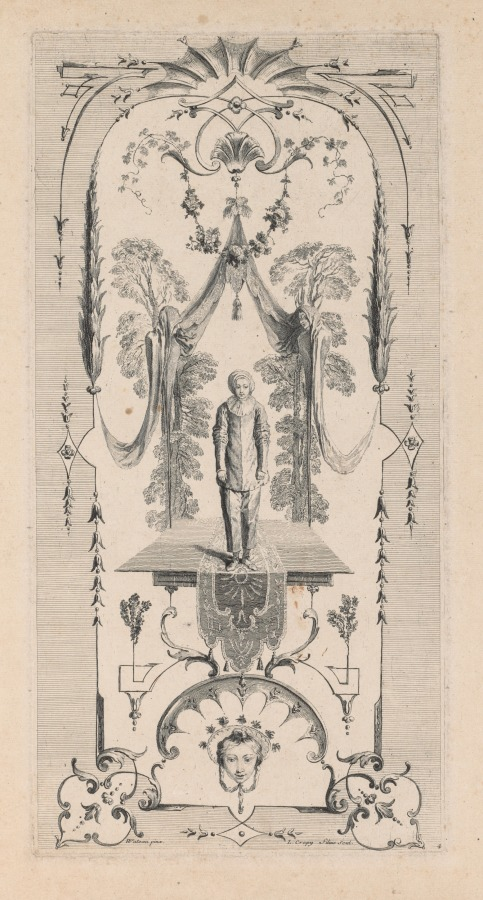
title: Pierrot, Arabesque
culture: France, 18th century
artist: Louis Crépy (French)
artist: after Jean-Antoine Watteau (French, 1684–1721)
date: early 1700s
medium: engraving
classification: Print